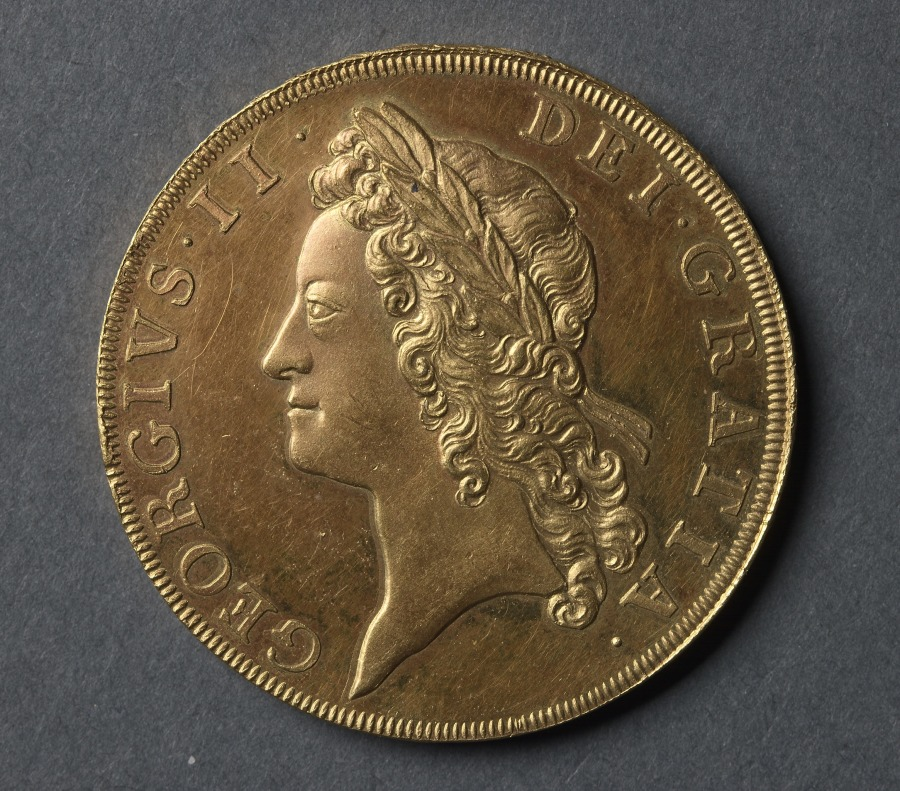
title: Five Guineas: George II (obverse); Shield of Arms (reverse)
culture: England, George II, 1727-1760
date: 1731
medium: gold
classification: Coins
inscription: GEORGIVS . II . DEI . GRATIA .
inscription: M.B.F.E.T.H.REX.F.D.B.ET.L.D.S.R.I.A.T.ET.E.1731.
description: This coin was probably struck as a proof. Under George II the same denominations of coinage appeared as in previous reigns since the coinage reform of 1662. The elephant, or elephant and castle no longer appear on the obverse. In 1729 the initials E I C appeared below the head on some of the five guineas, and on the guinea and half guinea of other dates. These signify that the coins were struck for the East India Company, or from gold sent by that company for coining at the Royal Mint.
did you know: The shield shows from top right to bottom left: England and Scotland, France, Ireland, and the Electorate.